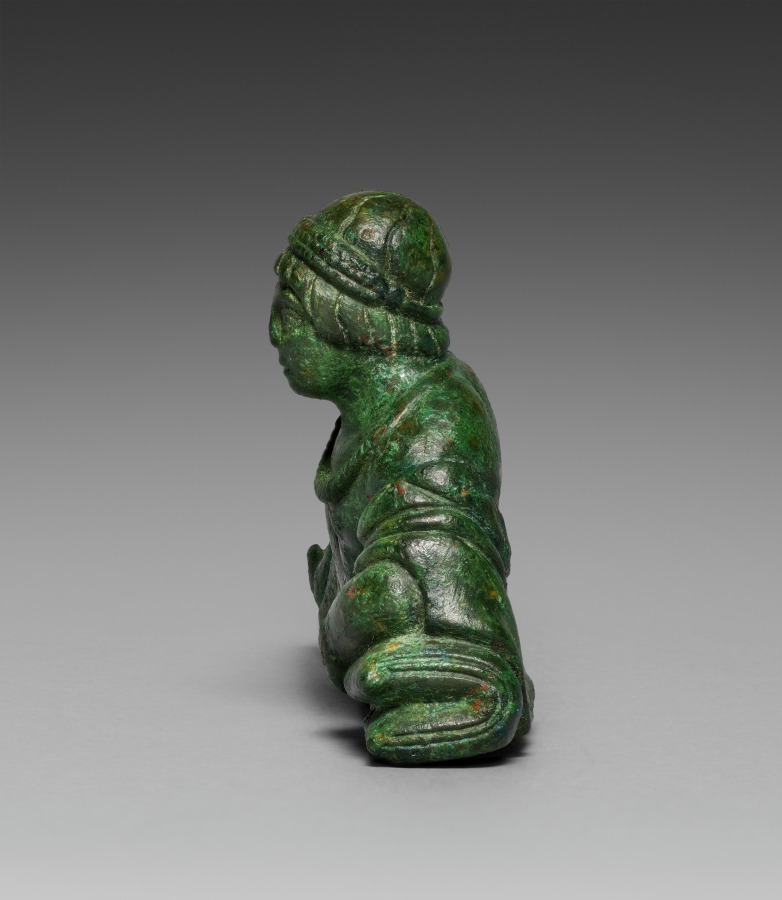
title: Vessel Ornament of Banqueter Holding an Omphalos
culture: Etruscan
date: probably 400–375 BCE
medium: bronze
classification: Sculpture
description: This bronze banqueter figurine was one of six once adorning the rim of a large basin, now lost. Cast in molds with individualized details, most have grooves on their underside to attach to the basin. Minute traces of gilding remain on areas of clothing and skin (mostly visible only under magnification), suggesting that they may have been completely gilded. Two handles in the form of hippocampi, horses with serpentine tails, also belonged to the basin and are now displayed at the Michael C. Carlos Museum at Emory University. The basin may have been used to hold liquid for a banquet, or was perhaps funerary. This bronze figurine holds a phiale mesomphalos, a shallow wine bowl, in his right hand. The vessel is tilted upward as if to spill its contents, perhaps as a libation for the gods. Traces of gilding remain in the corners of the phiale mesomphalos and the figurine’s drapery. His left hand rests against a fold of cloth slipping over his shoulder. A garland lies on his bare chest and another crowns his head. The banqueter shares many similarities with 1987.158.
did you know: Though primarily associated with dedicatory libations, the phiale mesomphalos could also be used for drinking.